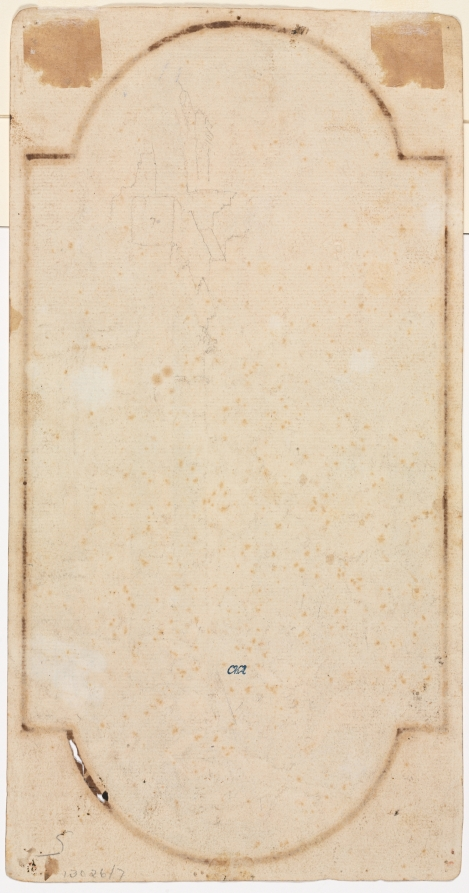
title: Fragment of an Arch (tracing from recto) (verso)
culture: Italy, 18th century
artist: Andrea Locatelli (Italian, 1695–1741)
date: first half 1700s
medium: black chalk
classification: Drawing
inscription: lower left, in graphite: 5 [upside down]